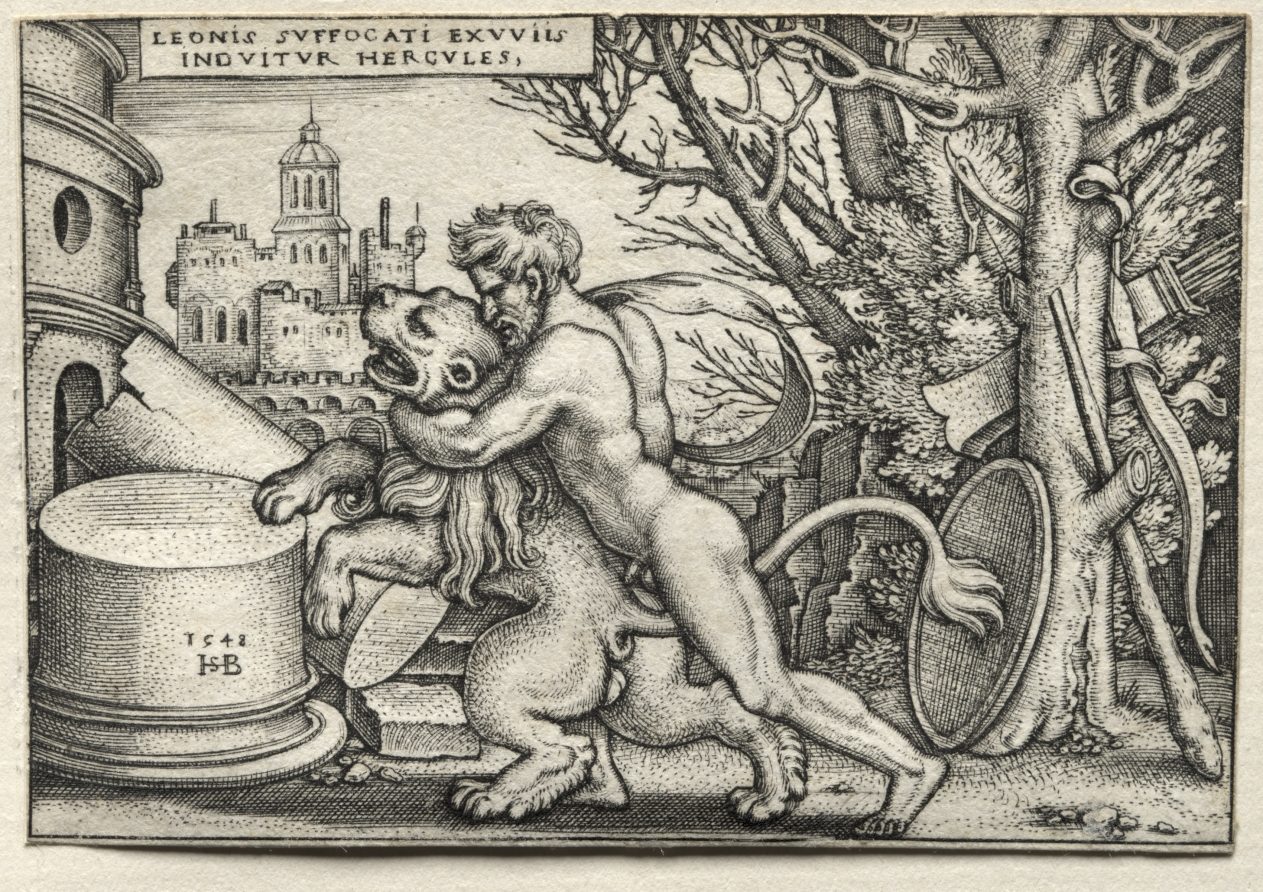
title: The Labors of Hercules: Hercules Strangling the Nemean Lion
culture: Germany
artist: Hans Sebald Beham (German, 1500–1550)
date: 1548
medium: engraving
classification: Print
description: Hercules uses his bare hands to strangle the lion that terrorized the people of Nemea. The beast was invulnerable to his weapons, which Hercules propped against the nearby tree. In art, Hercules often appears wearing the pelt of the Nemean lion, an identifying symbol that recalls this legend and that characterizes the hero’s strength and fearlessness. Beham was one of several German printmakers referred to today as the “Little Masters.” They established their artistic prowess by engraving remarkably small prints, appealing to collectors fascinated with miniature objects and curiosities.